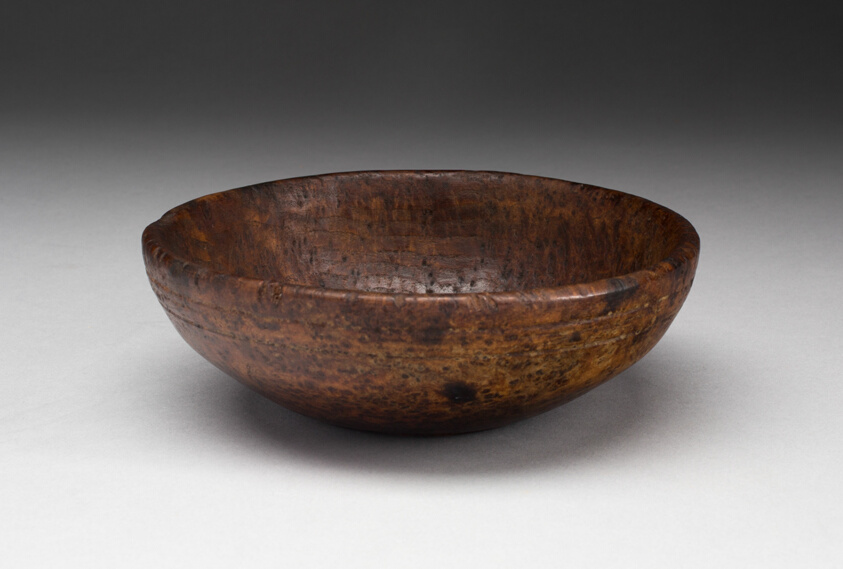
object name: Decorative Arts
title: Bowl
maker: Artist unknown (American, 18th century)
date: 1700–75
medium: Maple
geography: United States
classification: bowl; wood; american decorative arts; american arts; decorative arts